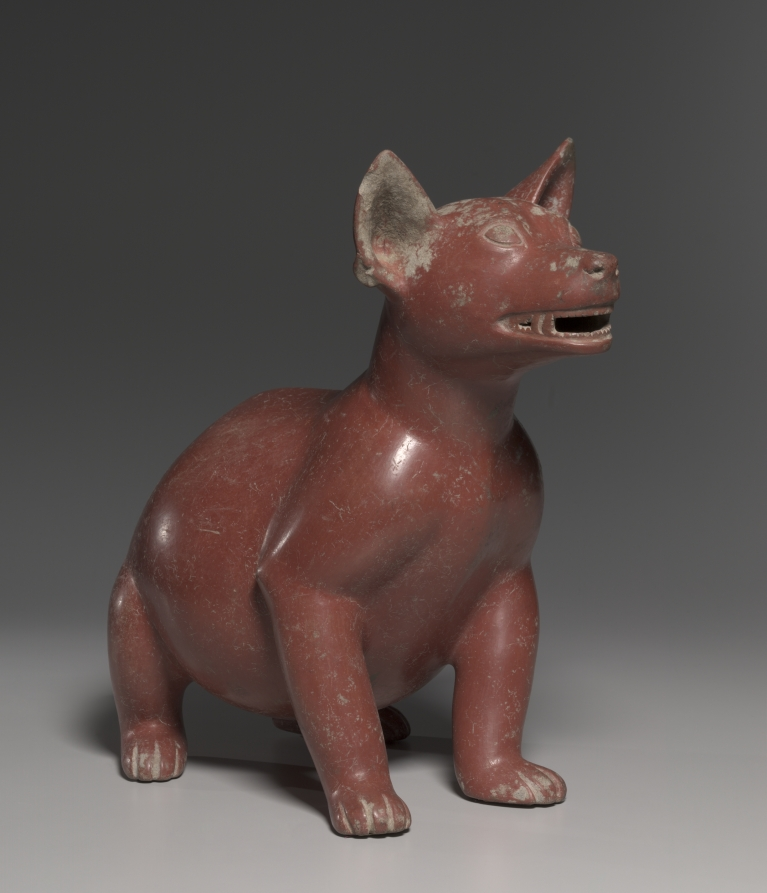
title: Male Dog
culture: West Mexico, Colima, Comala style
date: 200 BCE–300 CE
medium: earthenware with burnished red slip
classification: Sculpture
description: One of the best-known subjects of West Mexican tomb sculpture is the native hairless dog, which is shown naturalistically-as here-but also wearing a human mask, signaling complex meanings.These meanings are not well-understood, but like later Mesoamericans, West Mexicans may have believed that dogs served as guides or guards in the underworld realm of the dead. For the living, they also served as food.